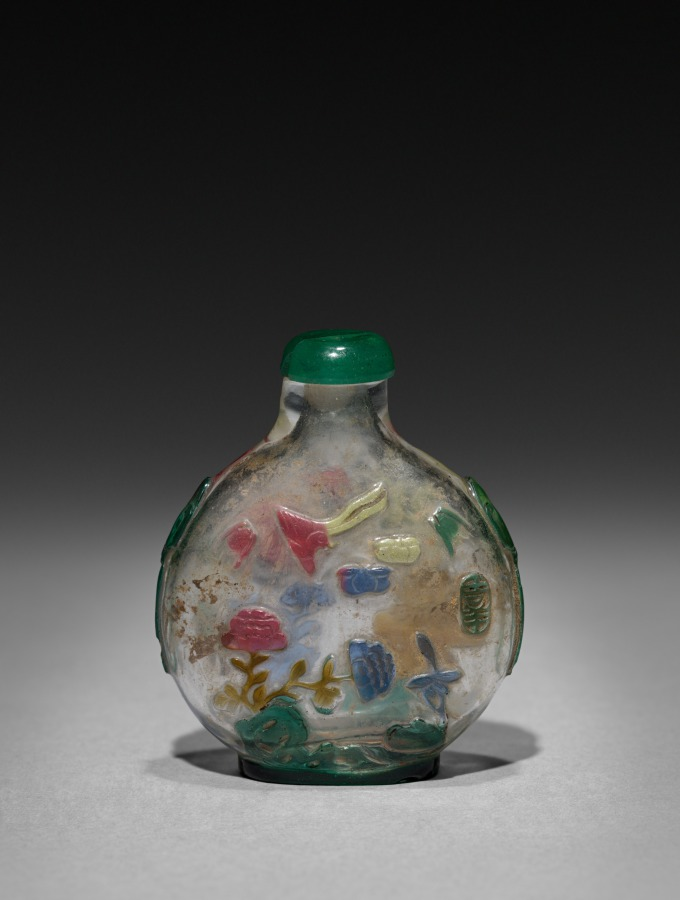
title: Snuff Bottle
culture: China, Qing dynasty (1644-1911)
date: 1644–1911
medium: glass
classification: Glass